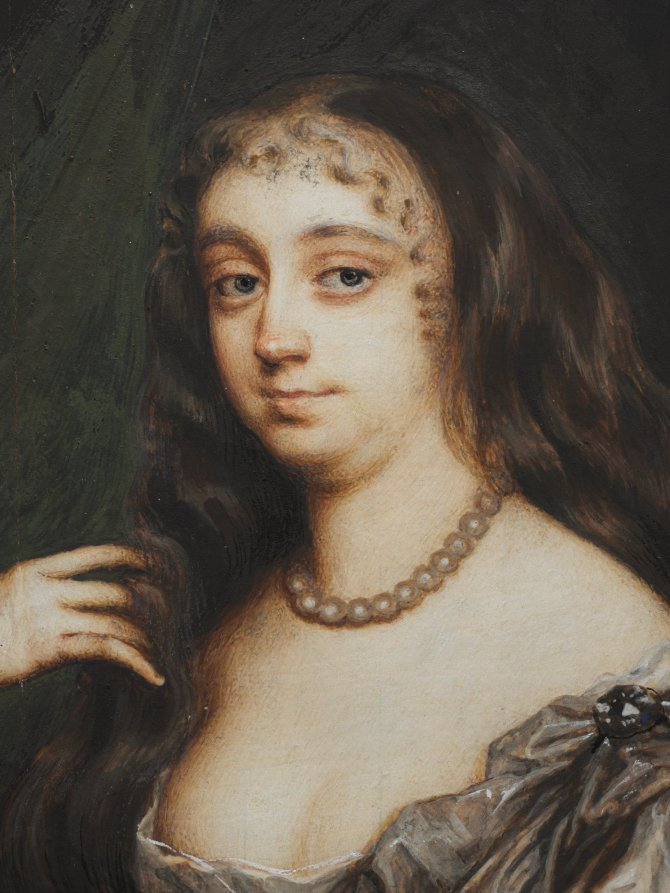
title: Portrait of Anne Hyde, Duchess of York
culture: England, 17th century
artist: Nicholas Dixon (British, c. 1708)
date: c. 1662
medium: watercolor on vellum in a large wooden frame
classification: Portrait Miniature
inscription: Label inside of back: Henry J. Murcott, London. Written in ink on backing: "Anny Hyde, first Wife of James II, Mother of Queen Mary II, Queen Anne. From Lord Currie's collection."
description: Though knowledge about his birth and training remain obscure, Nicholas Dixon is known to have been a favorite miniature painter of the English court at the close of the seventeenth century. He succeeded Samuel Cooper (1608/9–1672) as limner to King Charles II in 1673 and was Keeper of the King’s Picture Closet, for which he was granted an irregularly paid annuity of £200. Dixon painted a substantial number of ambitiously scaled miniatures—which became increasingly uncommon among practitioners of the art form when the more constrictive support of ivory supplanted vellum in the early 1700s. Dixon often signed his work with the monogram ND, and many of his large cabinet miniatures were copies of portraits, religious scenes, and mythological paintings by old masters, thirty of which formed part of the collection of the dukes of Portland. Among the characteristics of his style are ruddy flesh tones and drowsy eyes, and like the work of John Hoskins (c. 1590–1665), who may have been his teacher, Dixon favored softer modeling and diffuse lighting of his subjects, as opposed to the dramatic shadows employed by Cooper. Two lottery schemes—one in 1684/85 and the other in 1698— involving the exhibition of miniatures and the distribution of cash prizes proved disastrous for Dixon, who was in financial ruin by 1700 and constrained to sell a large number of works from the lottery. Anne Hyde (1637–1671), the sitter in this portrait, was around the age of twenty-four when the miniature was painted. She faces right and sits upon a dull red chair before a dressing table covered with a deep red embroidered cloth or tapestry that is fringed at the edges. A mirror and open jewel box lie on a table that is in front of a dark green curtain. The sitter has gray eyes and wears a golden brown satin décolleté dress with white ruffled undersleeves ornamented with jeweled closures. A necklace of large pearls hangs around her neck, and jeweled brooches fasten a winding rope of pearls to the bodice of her gown. Her right elbow rests on the table, and her fingertips comb through her long, wavy brown hair, which falls over her shoulders to below her waist. Her left arm extends toward her knee as she lightly holds a measure of her sash under her thumb while pointing downward with her index finger. The gracefully arranged, tapered fingers indicate Restoration court refinement.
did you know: This portrait is after a well-known and frequently copied oil painting by Peter Lely; it is nearly identical but with crimson and gold drapery in place of the dressing table and mirror.